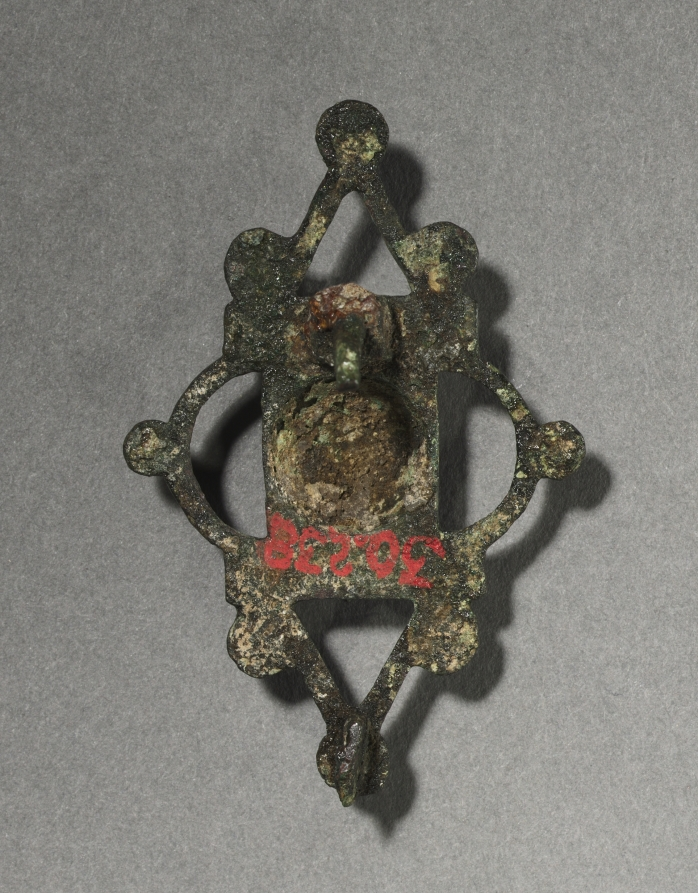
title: Ornamental Brooch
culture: Gallo-Roman or Romano-British, Migration period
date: c. 100–300 CE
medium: bronze and champlevé enamel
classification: Jewelry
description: These brooches functioned as garment clasps (much like the generally larger fibulae) and are distinctive for their decorative enamels. The art of enameling was highly popular among the conquered peoples who lived on the outskirts of the Roman empire, chiefly the Celts and the Gauls. Though the enameling technique was practiced by the Romans themselves on small objects, the brightly colored decoration readily appealed to "barbarian" taste. By the AD 200s, enameled brooches like these were being made in abundance by the native peoples of Britain and Gaul (modern France and Belgium).